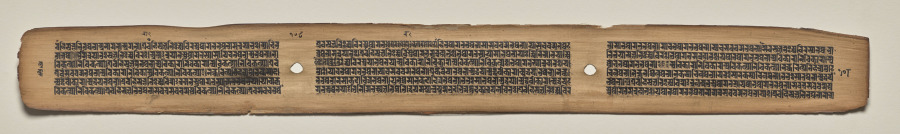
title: Text, Folio 108 (verso), from a Manuscript of the Perfection of Wisdom in Eight Thousand Lines (Ashtasahasrika Prajnaparamita-sutra)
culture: Eastern India, Bihar, Vikramashila Monastery. Painting: Nepal, Kathmandu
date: Sunday, September 14, 1119 (year 239 of the Newar Samvat in the month of Ashvina)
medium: gum tempera and ink on palm leaves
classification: Painting